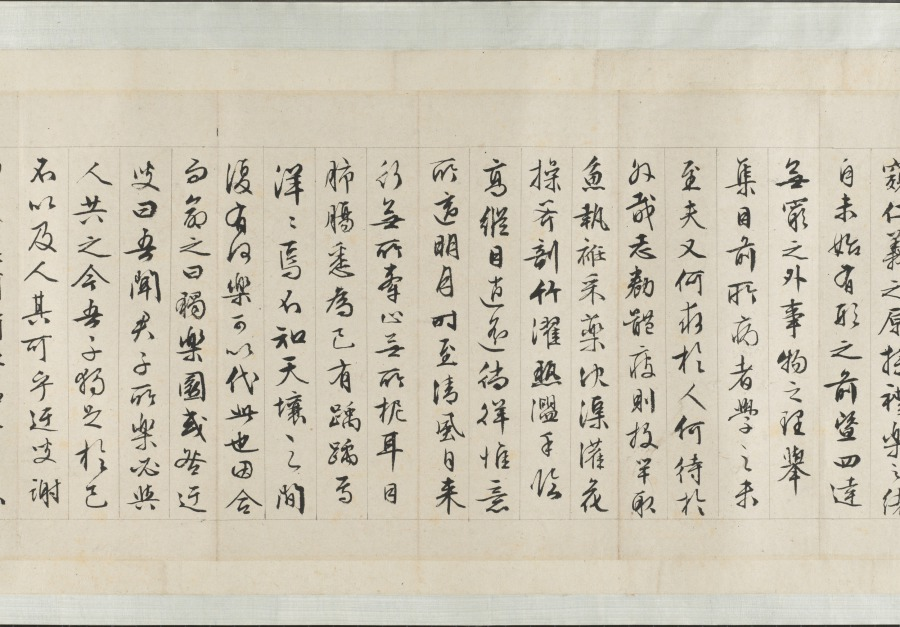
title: Garden for Solitary Enjoyment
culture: China, Ming dynasty (1368–1644)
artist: Qiu Ying (Chinese, 1494–1552)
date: 1515–52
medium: Handscroll; ink and light color on silk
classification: Painting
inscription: Accompanying text of an essay together with seven poems of Sima Guang (1019–1086) and one poem of Su Shi (1037–1101) written by Wen Zhengming (1470–1559) in 1558.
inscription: 2 colophons and 82 seals: 4 seals of Wen Zhengming 文徵明 (1470–1559); 59 seals of Xiang Yuanbian 項元汴 (1525–1590); 1 colophon, dated 1644, and 7 seals of Xiang Yukui 項禹揆 (c. late 1500s–1659); 1 colophon, dated 1880, and 2 seals of Weng Tonghe 翁同龢 (1830–1904); 2 seals of Ch'eng Chen-i (19th c.); 1 seal of Han Ch'ung (19th c.); 4 seals of Wan-go H. C. Weng 翁萬戈 (1918–2020); 3 seals unidentified.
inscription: Colophon by Xiang Yukui 項禹揆 (c. late 1500s–1659): The painting of The Garden for Self-enjoyment on the right by Shih-chou, Mr. Qiu [Qiu Ying] is in the style of Li Lung-mien. Its mood is peaceful, as if meeting the ancient gentlemen face to face among the brushes and silk; it lifts one above the sordid bustle of life. Formerly, my late father handed me this scroll which had only the painting without the written essay. I considered asking a good calligrapher to write the essay to add to it but was afraid that the quality of the writing would not match the painting. Several years later, I saw at a friend's house this essay and poems (of Ssu-ma Kuang] written by Hengshan [Wen Zhengming], once owned by my grandfather; so I spared no expense to obtain it. I rejoiced at this and said: "The divine swords are finally united. How things are pre-destined!" Now my friend Chang Kung-chao's technique for mounting [painting and calligraphy] is excellent. Therefore by daring to take them out and join them together, I can preserve this beautiful story of singular reunion. Xiang Yukui recorded at Hai-yeh-t'ang [hall] two days before New Year's Eve in the jiasheng year of the Chongzhen era [1644]. trans. LYSL/HK/WKH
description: Garden of Solitary Enjoyment refers to a site built in 1073 by the statesman Sima Guang (1019–1086) after he had retired to Luoyang, Henan province. Every spring, visitors would flock to his garden. Each of its seven structures references a historic figure. Sima wrote: I channel streams [like Du Mu], to water flowers [like Bai Juyi], or trim bamboo [like Wang Huizhi]. . . . I know of no joy between heaven and earth that could take its place. Qiu Ying’s painting, created after an 11th-century version of the same theme, must have appealed to garden owners of the Ming dynasty, since it became the template for numerous Suzhou workshop copies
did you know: Sima Guang completed his monumental survey of Chinese history, Zizhi tongjian, in the garden depicted in this painting.